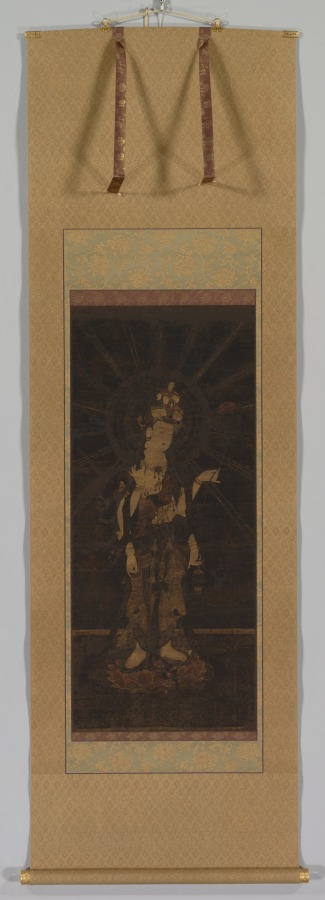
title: Eleven-Headed Kannon (Jūichimen Kannon)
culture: Japan, Kamakura period (1185–1333)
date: 1200s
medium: hanging scroll; color and cut gold (kirikane) on silk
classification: Painting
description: The Eleven-Headed Kannon, a deity of mercy and compassion in the Buddhist pantheon, was introduced into Japan in the 600s. By the 700s it had gained in popularity among an increasing number of believers, a condition it enjoyed until the end of the Kamakura period. The modest size and high quality of the materials apparent in this work indicate its use as a private devotional image. An earlier restoration of this painting included the use of an entire silk backing layer rather than silk patches with a paper backing. The tension that resulted between these two layers of silk, one old and the other recent, caused serious cracking to occur in the painting's surface. Moreover, the silk backing had been dyed a dark tone which did not enhance the appearance of the painting, although it did help hide damaged areas in the surface silk. Now two layers of backing paper support the painting, with its carefully fitted silk patches. These are toned slightly differently from the original surface values so that viewers can distinguish between the original and the modern restored areas. The original metal fittings have also been cleaned and reused. Other replacement fittings were deemed inappropriate for this early religious image and so new, specially designed ones are now in place.